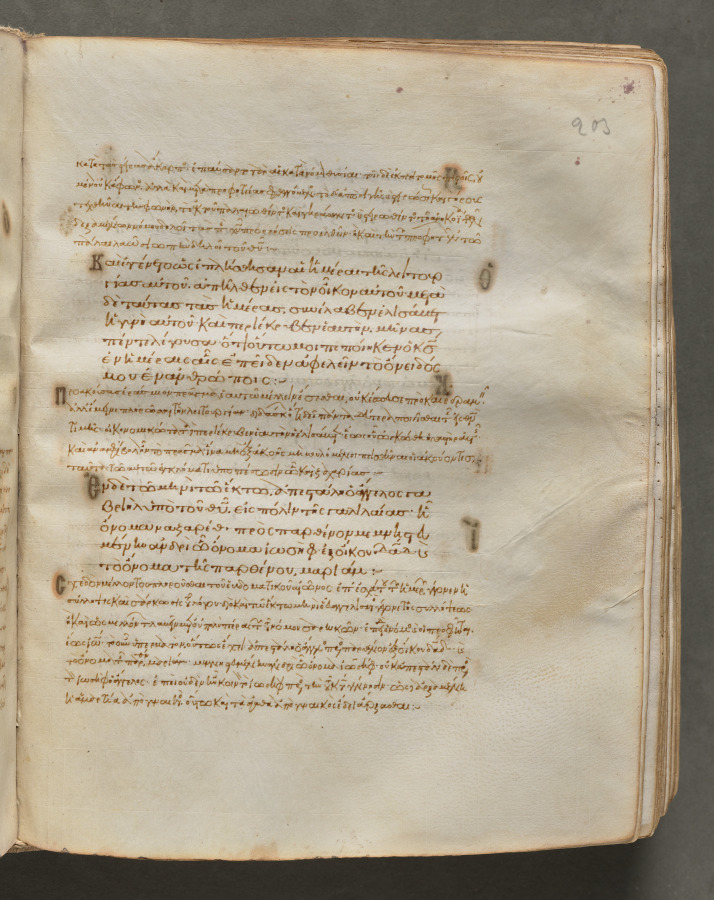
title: Text, folio 203 (recto), from a Gospel Book with Commentaries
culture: Byzantium, Constantinople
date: c. 1000–1100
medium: ink, tempera, and gold on vellum; leather binding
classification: Bound Volume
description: Each of the four gospels in this book opens on a page with brilliantly illuminated borders depicting the author of the text as well as birds-principally peacocks, symbols of the immortality of the soul-and fountains, representing the fountain of life and the salvation of the soul. This volume consists of 428 leaves with texts in Greek. Its level of sophistication suggests that it was probably written and decorated in a monastery in Constantinople.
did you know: Gospel Books were carried in procession through Byzantine churches.